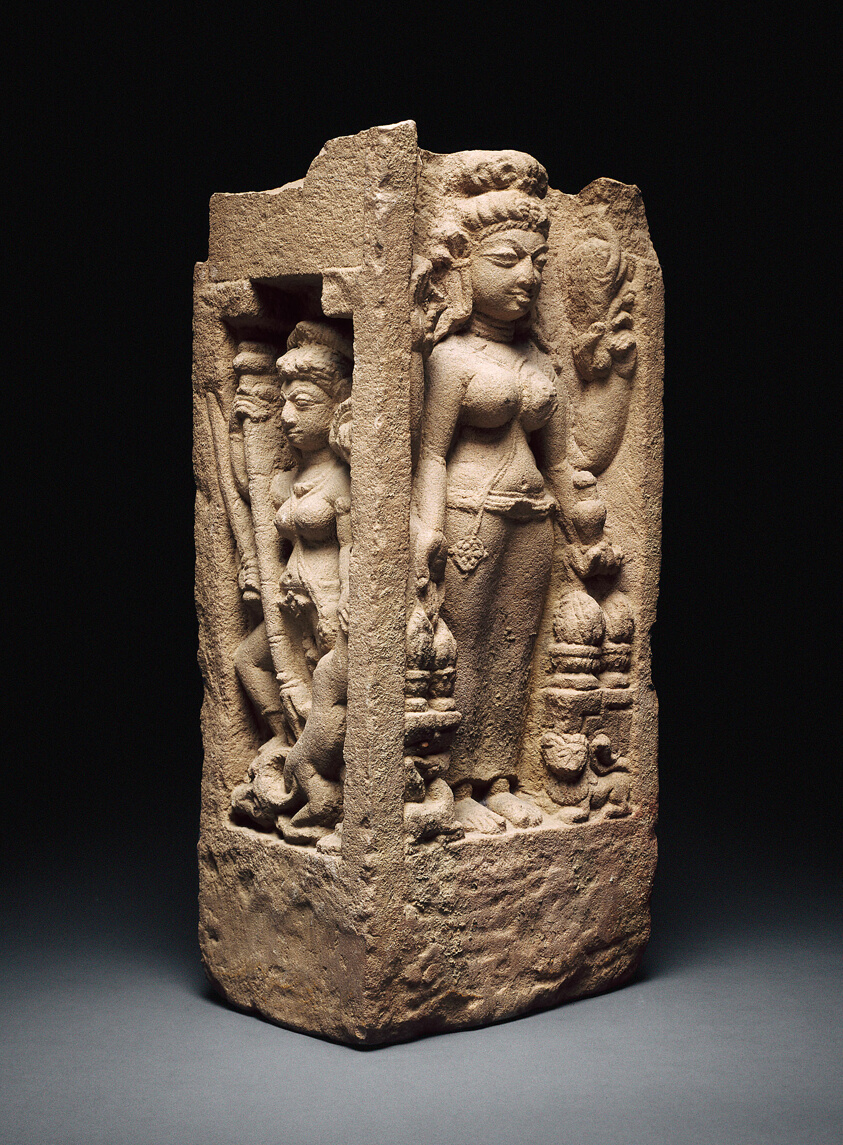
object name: Architectural fragment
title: Pillar Fragment with Gods Shiva and Ganesha and Goddesses Parvati and Durga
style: South Asian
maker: India; Madhya Pradesh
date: 8th/9th century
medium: Sandstone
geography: Madhya Pradesh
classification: stone; architectural fragment; asian art